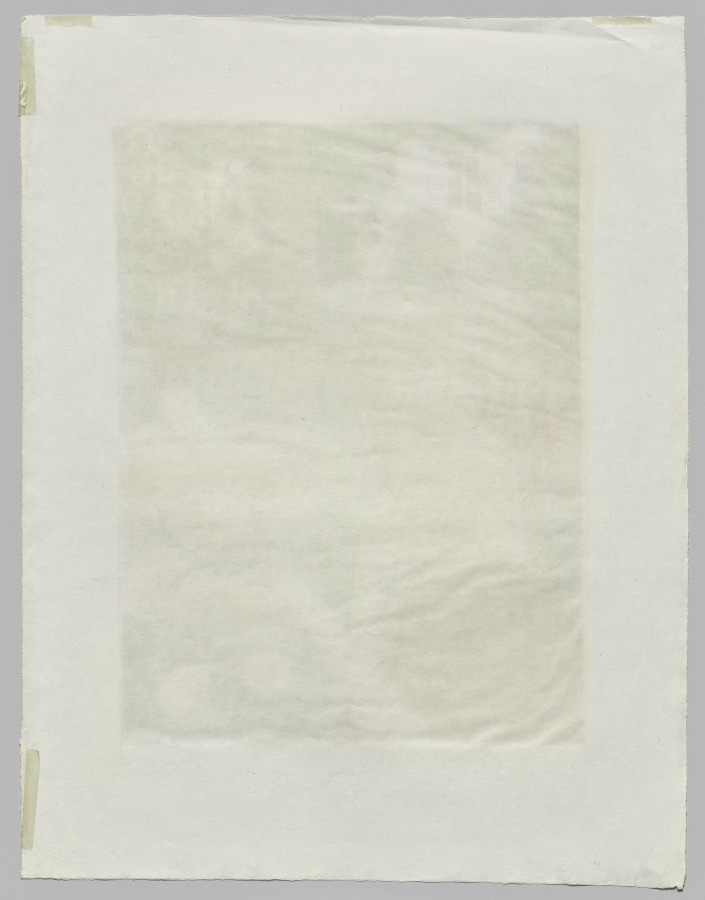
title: Morning Bouquet, Tears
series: Love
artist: Maurice Denis (French, 1870–1943)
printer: August Clot (French, 1858–1936)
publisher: Ambroise Vollard (French, 1867–1939)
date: 1899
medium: color lithograph on wove paper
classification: Print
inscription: Recto, lower left: le bouquet matinal, les larmes…”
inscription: In graphite, recto, lower right: “Maurice Denis (signed)”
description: Maurice Denis belonged to the Nabis, a group of artists who came together in 1889 to pursue a radical new style informed by subjective experience and emotion. This print is from a series in which Denis explored his devotion to his wife, Marthe, by depicting her in a variety of settings alongside titles drawn from his own journal. The vague but evocative images were meant to encourage the viewer to draw connections to the theme and meditate on its meaning.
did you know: Maurice Denis was a devout Catholic and often drew visual connections between his wife, Marthe, the subject of this print series, and the Virgin Mary.